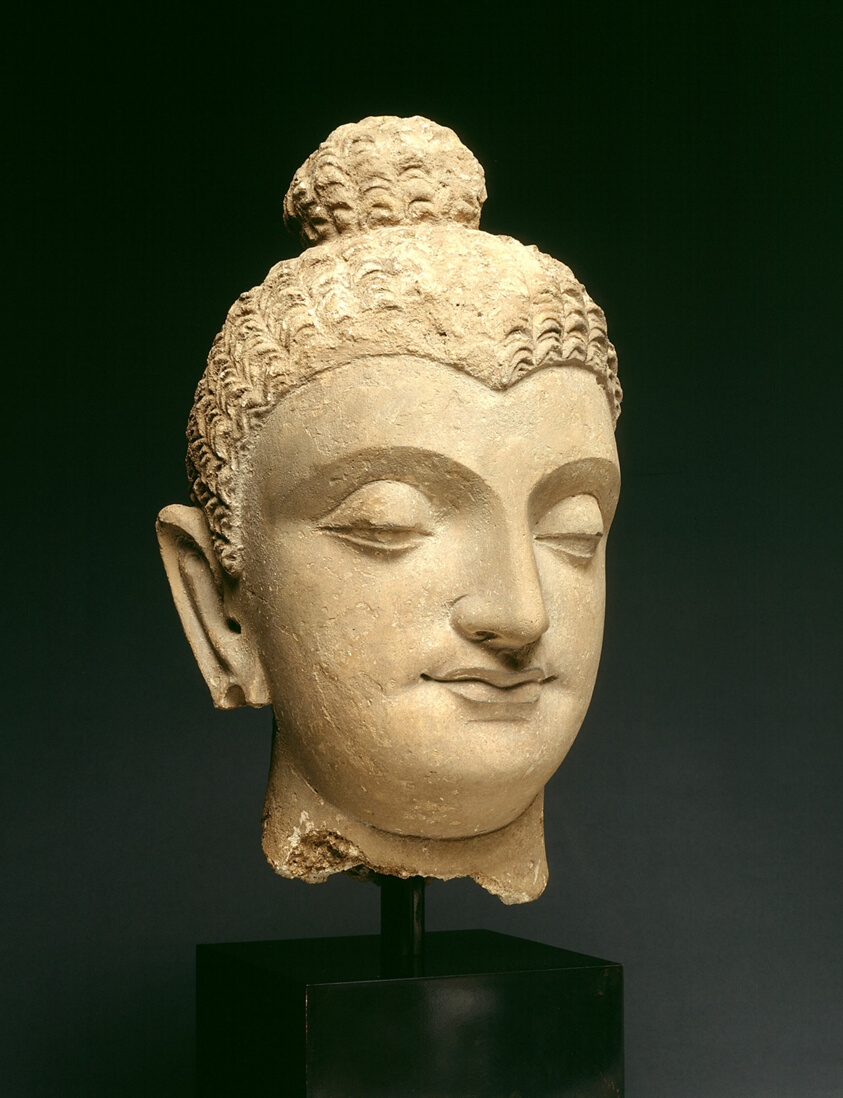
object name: Sculpture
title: Head of Buddha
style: South Asian, gandharan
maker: Afghanistan or Pakistan; Ancient region of Gandhara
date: 3rd/4th century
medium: Stucco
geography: Gandhara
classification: bust/head; stuccowork; sculpture; asian art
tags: Buddha